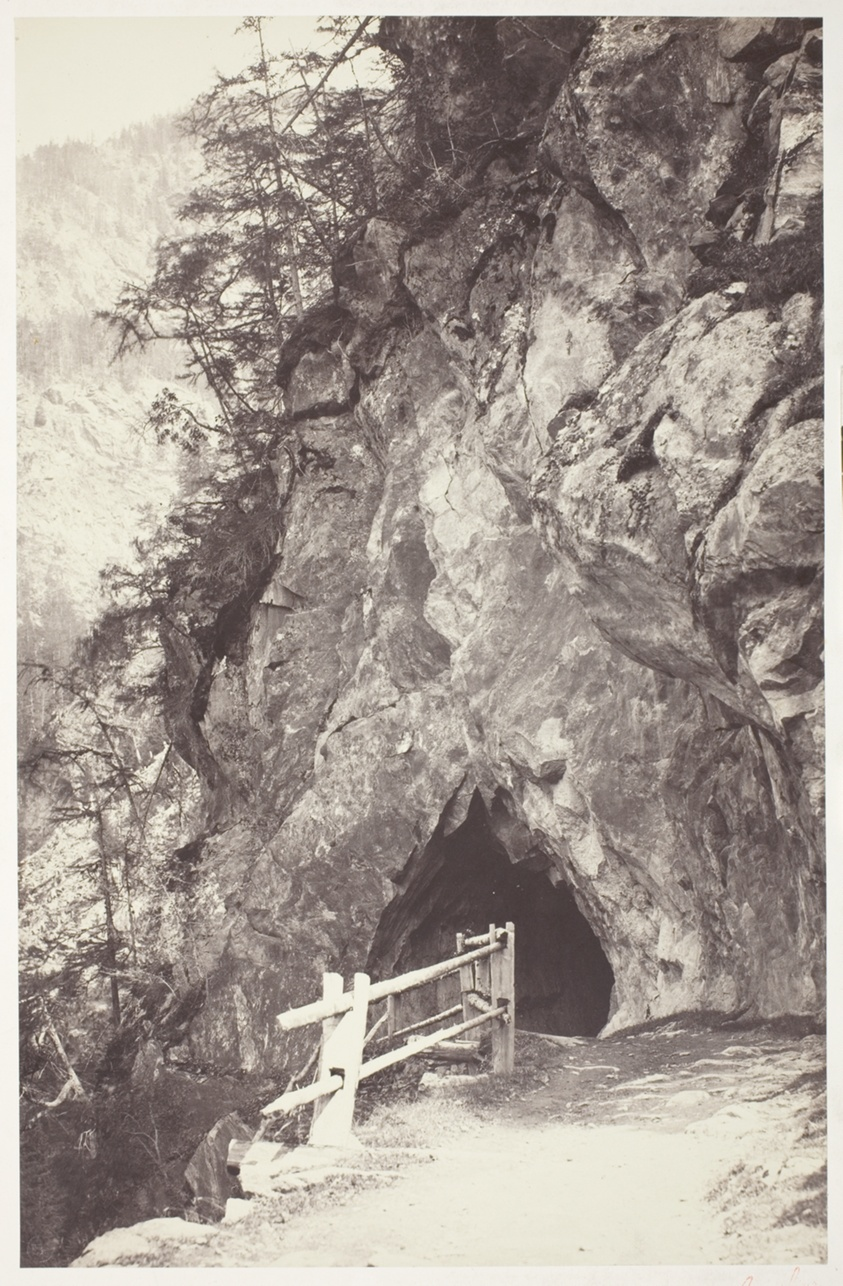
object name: Photograph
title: Savoie 41, Tunnel de la Tête Noire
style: 19th century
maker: Auguste-Rosalie Bisson (French, 1826–1900)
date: 1855/67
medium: Albumen print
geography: France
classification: albumen silver print; photographic process; photography; photograph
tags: Collected by Hugh Edwards